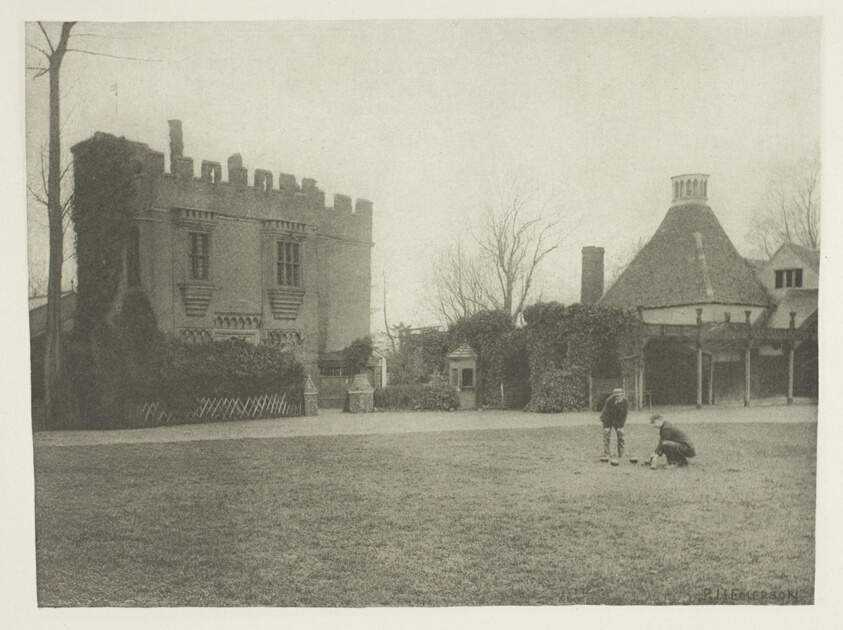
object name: Photograph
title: The Old Rye House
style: 19th century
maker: Peter Henry Emerson (English, born Cuba, 1856–1936)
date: 1880s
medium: Photogravure, plate XIII from the album "The Compleat Angler or the Contemplative Man's Recreation, Volume I" (1888)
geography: England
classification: photogravure; photomechanical process; photography; photograph